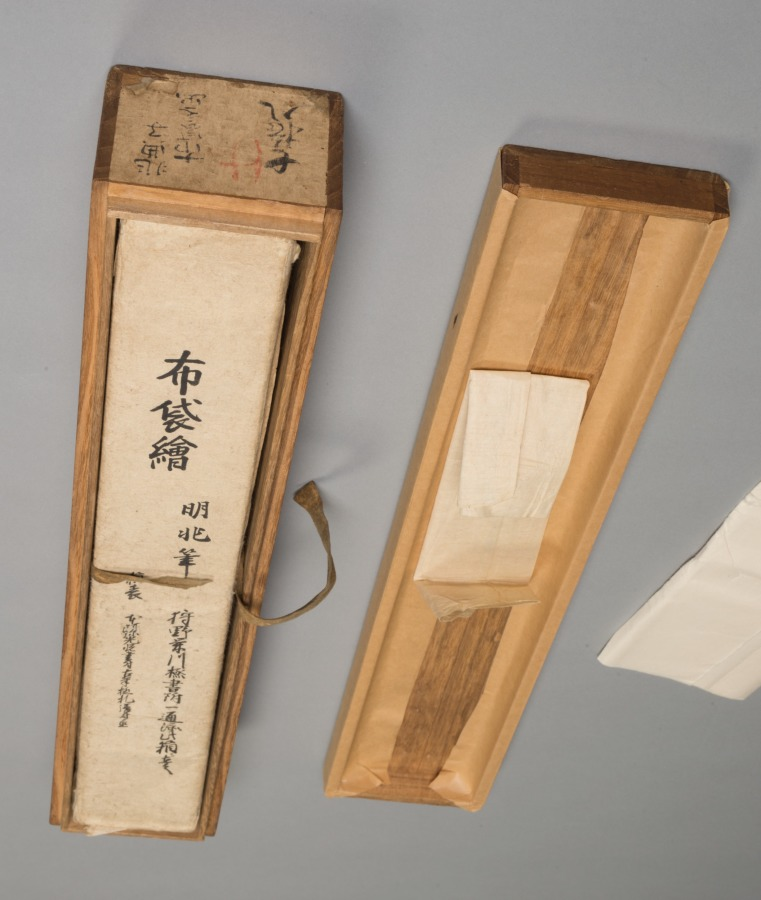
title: Hotei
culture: Japan, Muromachi period (1392–1573)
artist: Kichizan Minchō (Japanese, 1352–1431)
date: late 1300s–early 1400s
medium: hanging scroll; ink and slight color on paper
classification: Painting